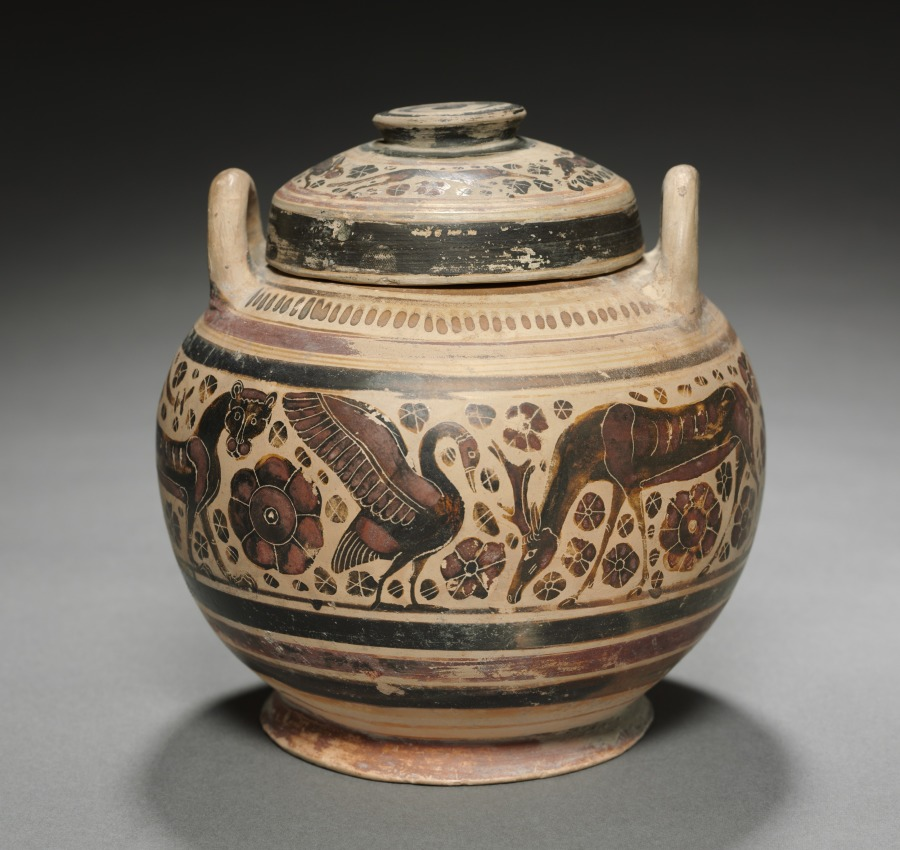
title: Black-Figure Pyxis (Cylindrical Lidded Box): Animals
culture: Greek, Corinthian (Middle-Late)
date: 500s BCE, with modern painting and incision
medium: ceramic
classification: Ceramic